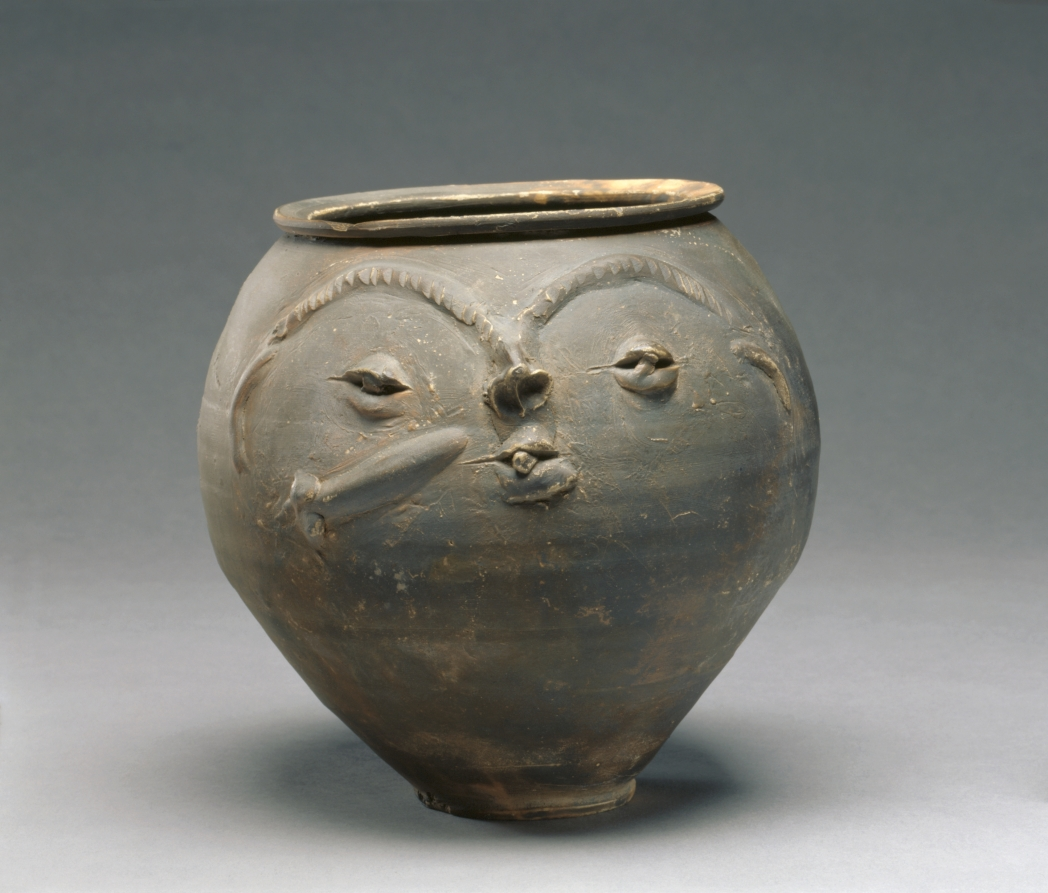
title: Face Urn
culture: Rhenish (Cologne), Gallo Roman, 2nd quarter, 1st Century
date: 25–50 CE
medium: reddish ware with gray burnished slip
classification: Ceramic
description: This wheel-thrown vase is decorated with humanlike facial features and a phallus applied to the face’s cheek. Wide arching eyebrows meet at the short bridge of the face’s puggy nose, which sits over lips pursed around its protruding tongue. Finger marks can be seen around the eyes and eyebrows where clay was added onto the surface of the vessel to form the facial features.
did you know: The phallus was often used as a protective symbol in the ancient world.